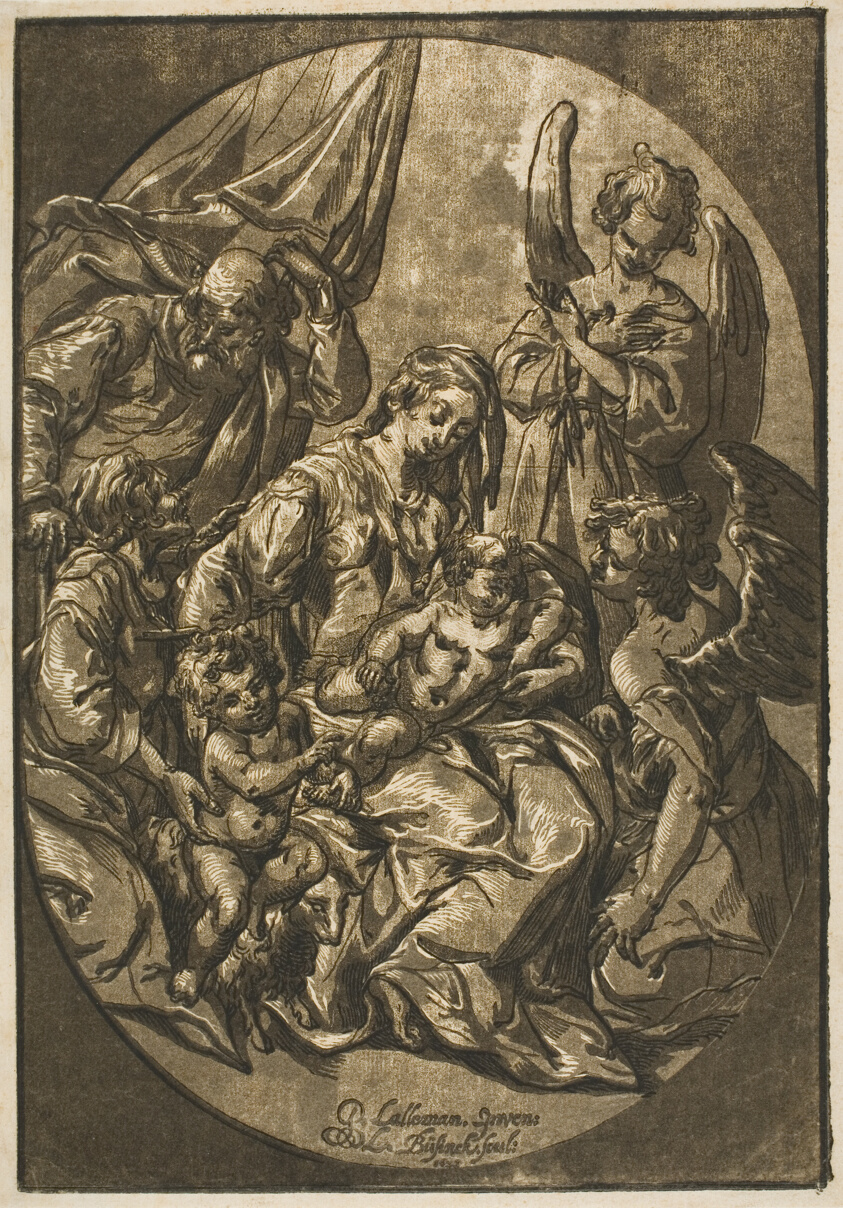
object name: Print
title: Holy Family in an Oval Frame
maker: Ludolph Büsinck (German, c. 1590-after 1643)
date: 1623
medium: Chiaroscuro woodcut from three blocks, on paper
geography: Germany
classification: woodcut; print; prints and drawing